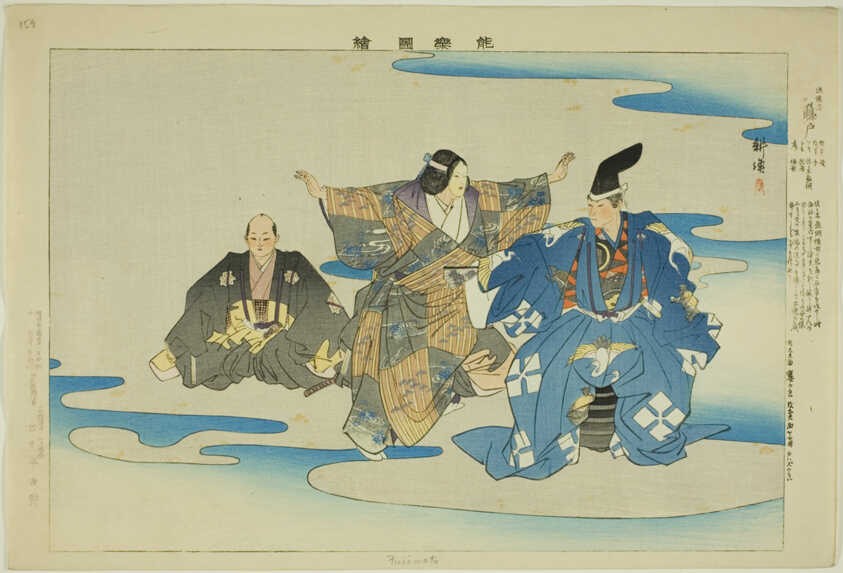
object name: Print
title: Fujimoto, from the series "Pictures of No Performances (Nogaku Zue)"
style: Japanese (culture or style)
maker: Tsukioka Kogyo; Japanese, 1869-1927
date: 1898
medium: Color woodblock print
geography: Japan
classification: woodblock print; print; asian art